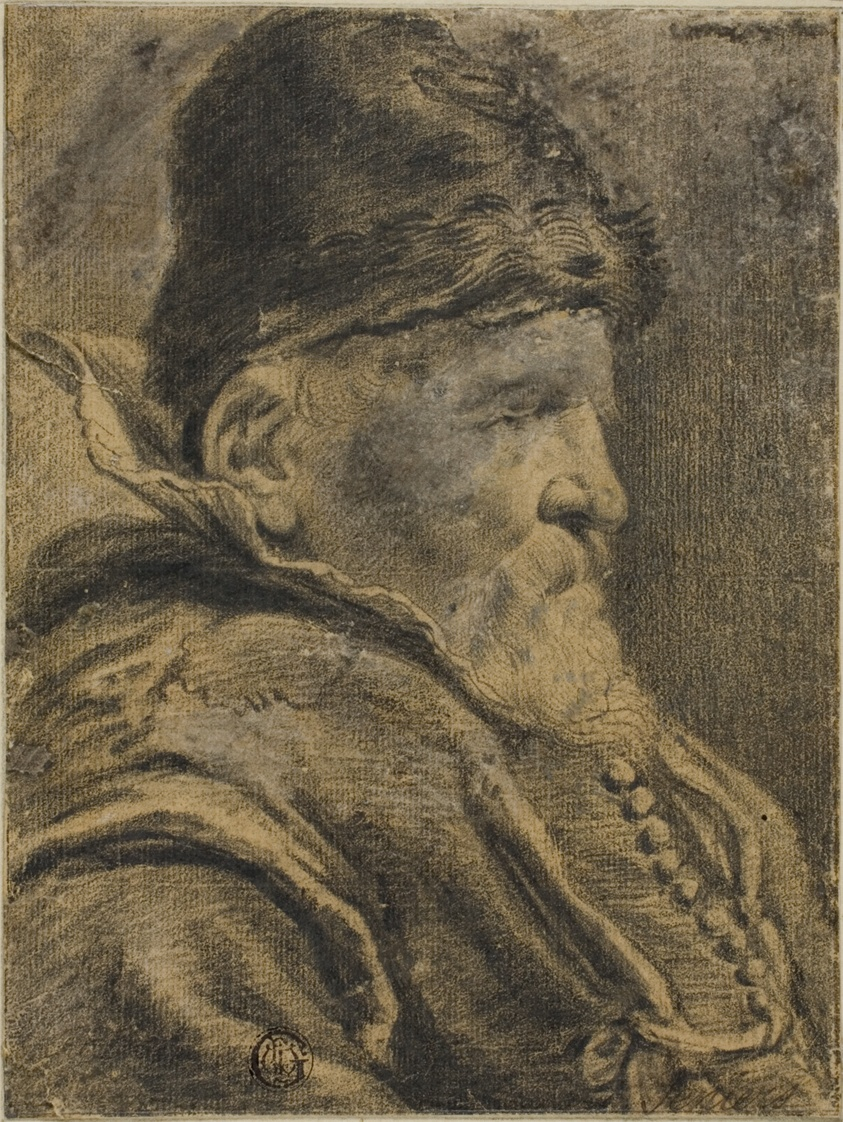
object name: Drawing and Watercolor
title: Portrait Bust of an Old Man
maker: Possibly David Teniers the Younger; Flemish, 1610-1690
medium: Black crayon, heightened with lead white (discolored), on tan laid paper, laid down on ivory laid paper, tipped on cream card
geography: Flanders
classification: crayon; drawings (visual works); prints and drawing